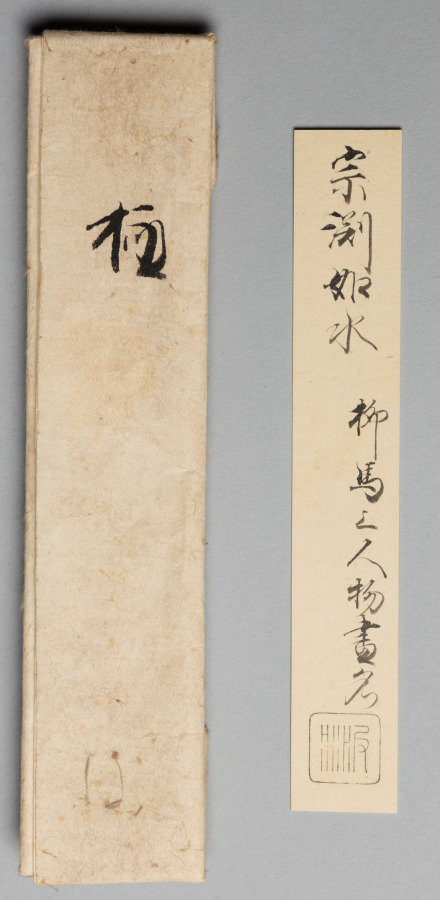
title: Chinese Literatus in an Autumn Landscape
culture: Japan, Muromachi period (1392–1573)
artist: Josui Sōen (Japanese, active c. 1489–1500)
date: late 1400s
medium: hanging scroll; ink on paper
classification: Painting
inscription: Signed: "Sō'en" 宗淵. Sealed: "Josui" 如水; one seal unread.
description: In this painting, Sesshū Tōyō’s disciple Sōen depicts a Chinese scholar-official astride a donkey with his attendant behind. Framing their passage on the right side of the scene are two bare willows, and on the left, geese in flight, the cries of which capture the pair’s attention. These elements suggest that the season is late autumn. Sōen, who famously received Sesshū’s 1495 Splashed-ink Landscape as a certificate of his success as a pupil, studied with the master in Suō, presentday Yamaguchi, after which he returned to his native province in the Kanto region.